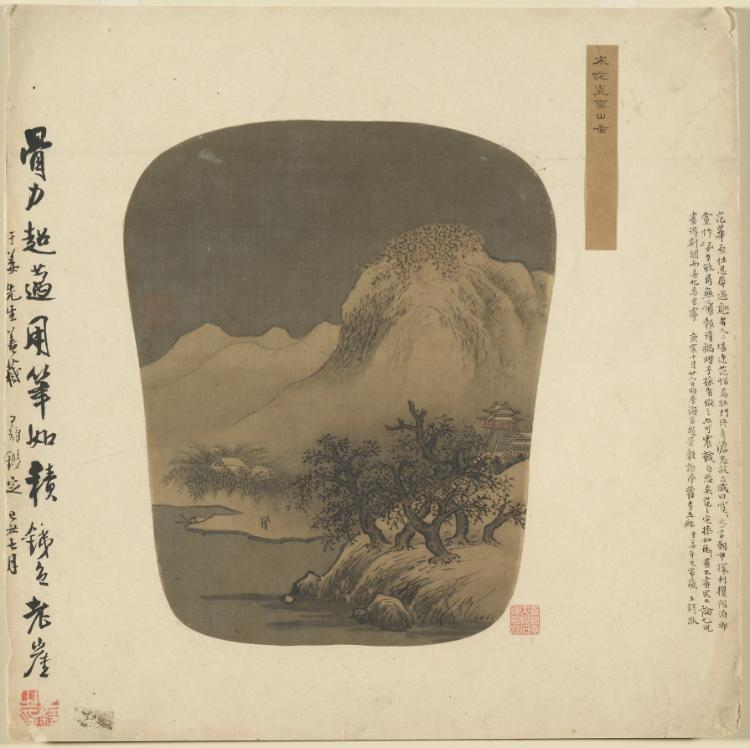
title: Fan-shaped Album Painting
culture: China, Ming dynasty (1368–1644)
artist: copy after Fan Kuan (Chinese, active c. 990–c. 1030)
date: 1368–1644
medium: ink and slight color on silk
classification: Painting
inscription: One seal; mounted as an album leaf with 2 inscriptions, title and two seals.